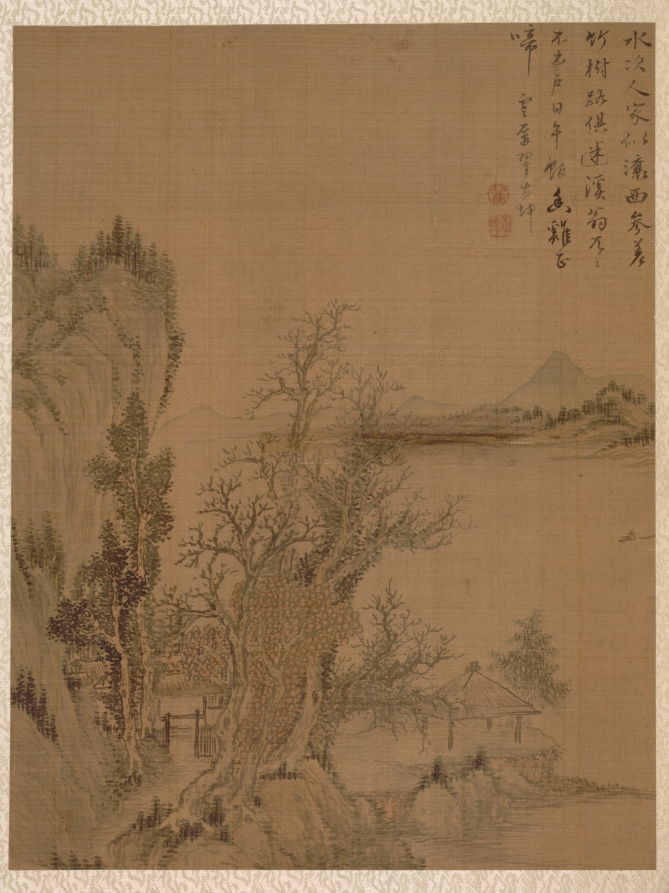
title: Landscape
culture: China, Qing dynasty (1644-1911)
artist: Zhai Dakun (Chinese, d. 1804)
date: 1775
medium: album leaf; ink and color on silk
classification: Painting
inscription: Dwelling by the Shore. By the water a human dwelling resembles Liaoxi, The scattered branches of bamboo and trees are all a jumbled mass. The old man of the stream resolutely refuses to come out of his gate, At noon he drinks in the fragrance, just as a cock crows. Yunping Zhai Dakun. Seals: 1) c/r "Zhai" 2) s/r "Zihou"